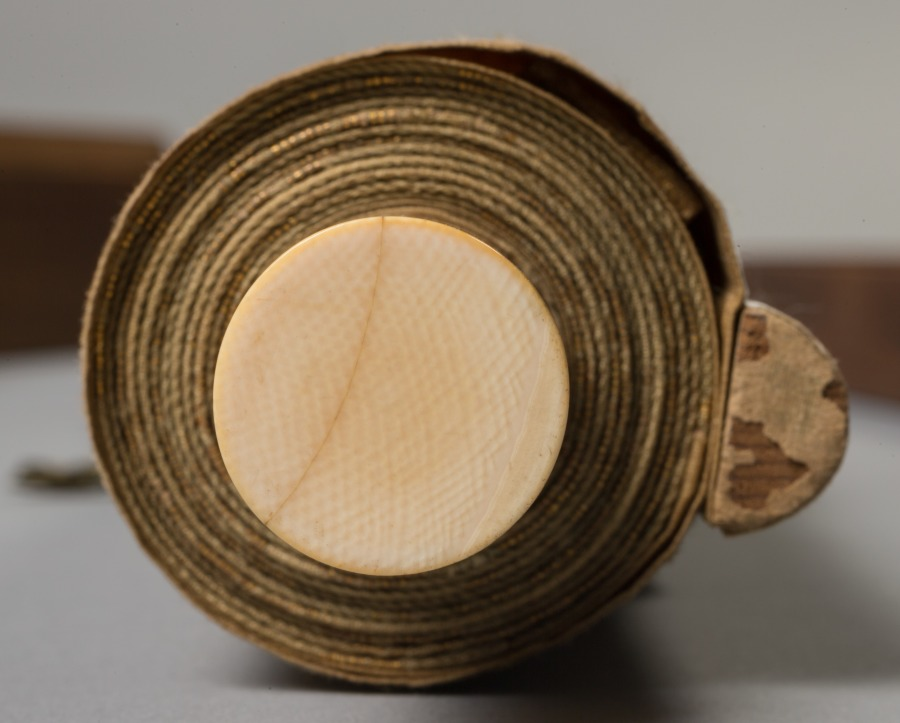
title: Swallows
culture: Japan, Edo period (1615–1868)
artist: Yamaguchi Sekkei (Japanese, 1644–1732)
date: late 1600s–early 1700s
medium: hanging scroll; ink and color on paper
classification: Painting